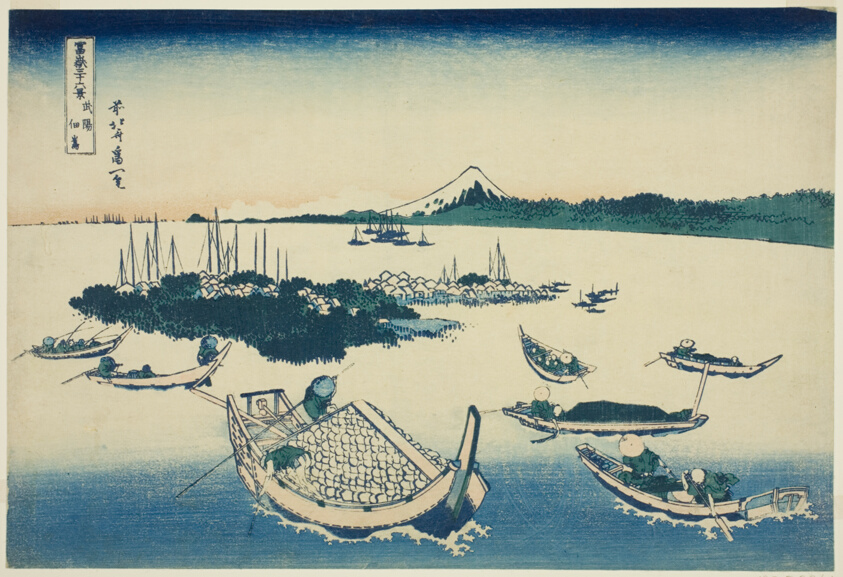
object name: Print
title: Tsukudajima in Musashi Province (Buyo Tsukudajima), from the series "Thirty-six Views of Mount Fuji (Fugaku sanjurokkei)"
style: Japanese (culture or style)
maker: Katsushika Hokusai 葛飾 北斎; Japanese, 1760-1849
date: c. 1830/33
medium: Color woodblock print; oban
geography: Japan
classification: woodblock print; print; asian art